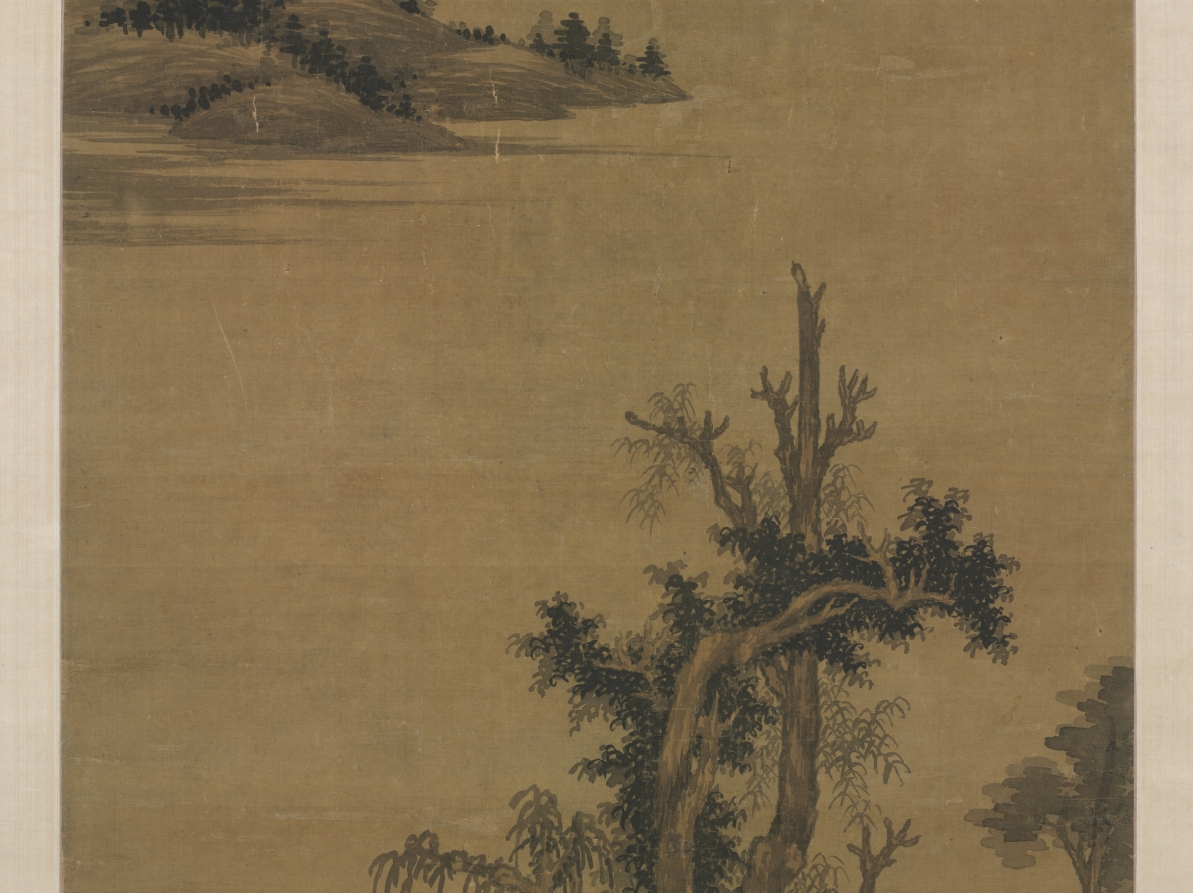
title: Fishermen-Hermits in Stream and Mountain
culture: China, Yuan dynasty (1271-1368)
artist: Zhao Yong (Chinese, c. 1289-c. 1362)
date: 1300s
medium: Hanging scroll; ink and color on silk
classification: Painting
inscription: 仲穆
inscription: [印] 吳興張氏圖書之記; [印] 心賞; [印] 張珩私印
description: In this typical southern two shores divided by a river composition, two fishermen, each seated in the stern of his covered houseboat, troll their hooks in the swirling water, holding short rods fitted with spooling reels. Zhao Yong was a son of the southern calligrapher and statesman Zhao Mengfu, who, like his father was a scholar-official in the Mongol-Yuan government. As public servants of the Yuan state and administration, scholar-artists like the Zhaos delighted in paintings that pictured them in nature as fishermen amid vistas of Jiangnan, which they considered their home.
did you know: The composition of two shores divided by a river was mostly famously associated with the Yuan painter Ni Zan.